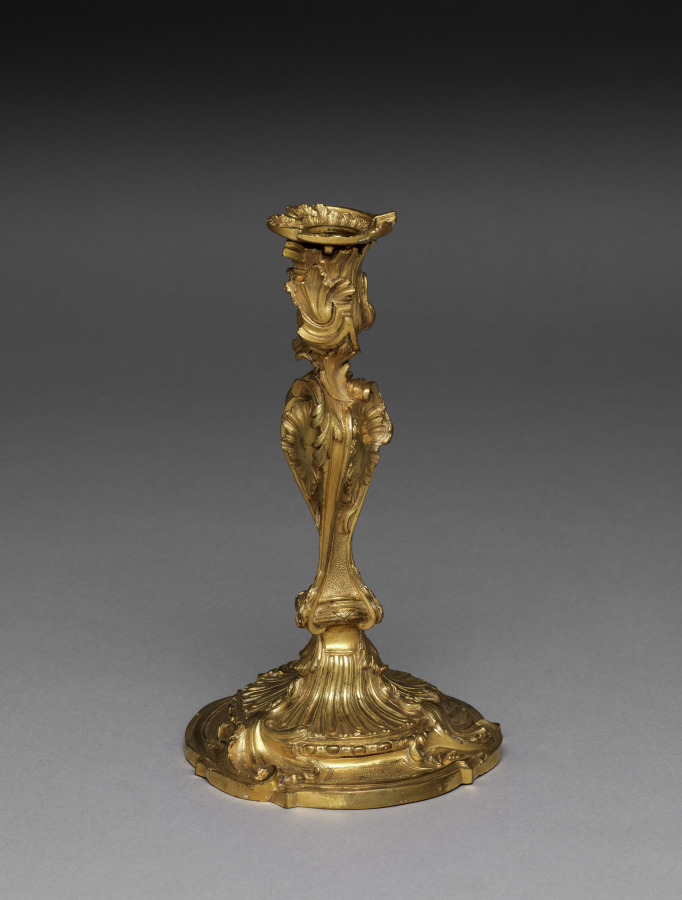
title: Candlestick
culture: France, 18th century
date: 1745–1749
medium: gilt metal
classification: Furniture and woodwork